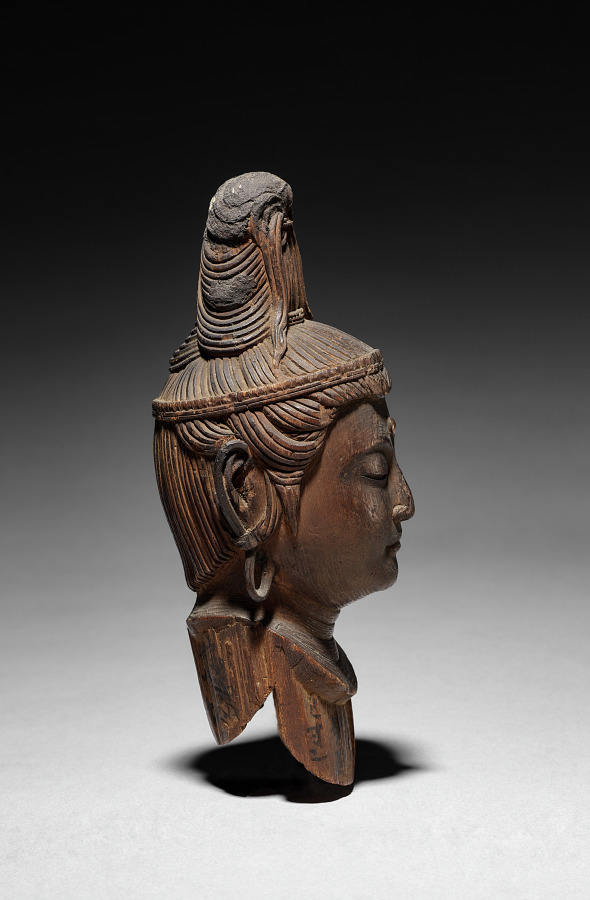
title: Head of Kannon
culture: Japan, Edo period (1615–1868)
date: late 1600s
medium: wood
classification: Sculpture